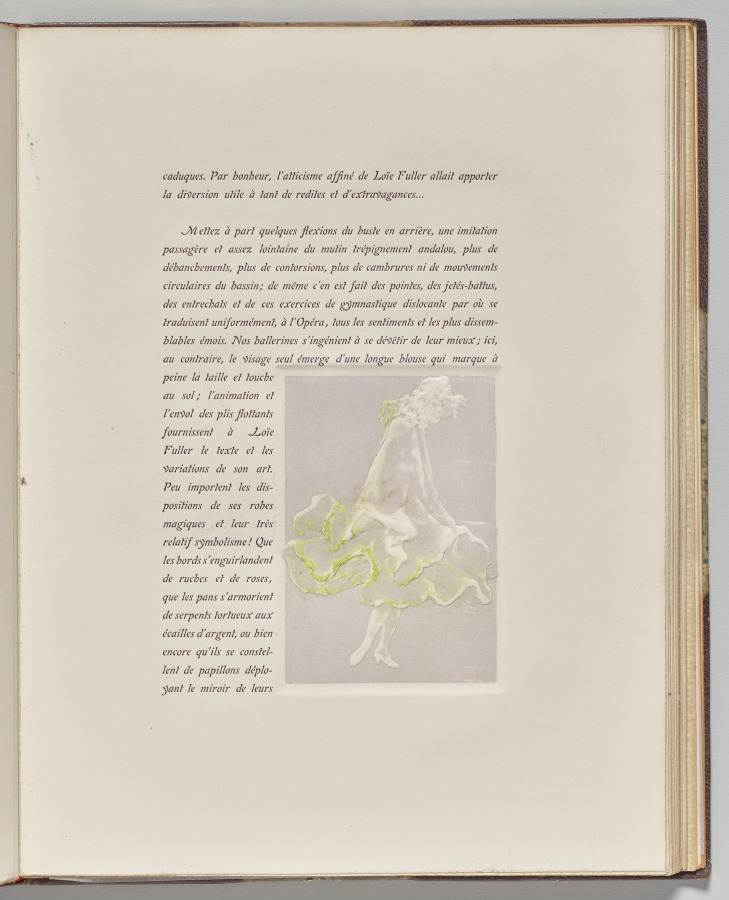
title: Dancing Woman with Arms Lowered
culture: France, early 20th Century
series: La Loïe Fuller, by Roger Marx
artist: Pierre Roche (French, 1855–1922)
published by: Les Cents Bibliophiles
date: 1904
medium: gypsograph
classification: Bound Volume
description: Although best known as a sculptor, Roche was a versatile and prolific artist who worked in many mediums. Loïe Fuller, the pioneer of modern dance who took Paris by storm in 1892, was one of his favorite subjects. He portrayed her in clay, bronze, marble, plaster, and in a series of gypsographs that illustrated an essay by the art critic Roger Marx. The book was described as "a precious monument to Loïe Fuller."